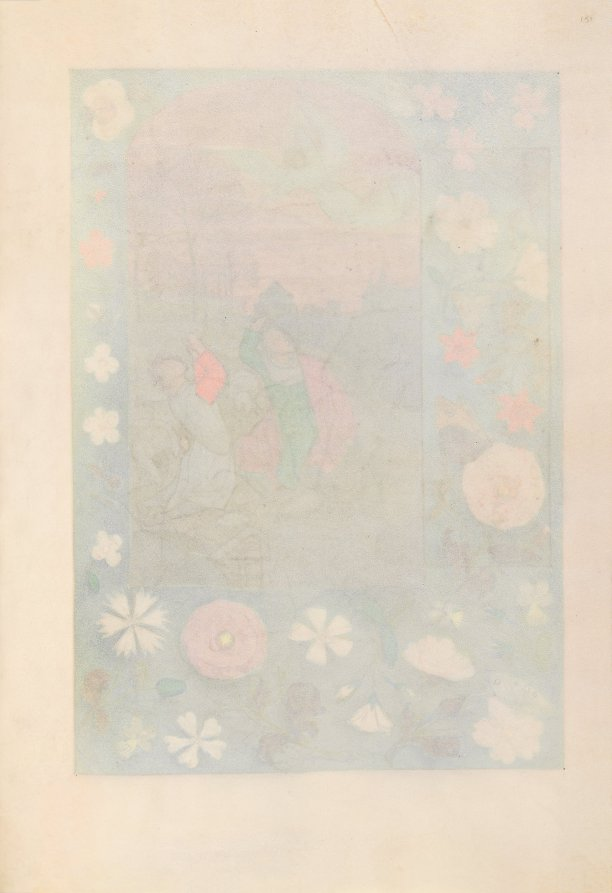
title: Hours of Queen Isabella the Catholic, Queen of Spain: Fol. 131r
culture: Flanders, Ghent and Bruges, late 15th century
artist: Master of the First Prayerbook of Maximillian (Flemish, c. 1444–1519)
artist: and Associates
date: c. 1500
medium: ink, tempera, and gold on vellum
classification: Bound Volume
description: This manuscript was illuminated by a circle of at least five highly organized manuscript painters active in the Flemish cities of Ghent and Bruges. The principal illuminator was Alexander Bening, who painted the majority of the book's miniatures. Manuscripts produced by this circle of artists are renowned for the decoration of their borders, which typically feature a rich variety of realistically-painted flowers, birds, and butterflies. This prayer book, called a book of hours, was intended not for a cleric, but for the private devotions of a lay person-in this case, Isabella the Catholic, Queen of Spain (1451-1504). Isabella's coat of arms embellishes the book's frontispiece. It is unlikely that the book was commissioned by the Queen herself; rather, she probably received it as a diplomatic gift from someone courting her patronage, perhaps Cardinal Francisco Jimenez de Cisneros. A Franciscan friar, Jimenez was dependent upon Isabella for his advancement, first to the post of Queen's confessor in 1492, and then to Archbishop of Toledo in 1495.